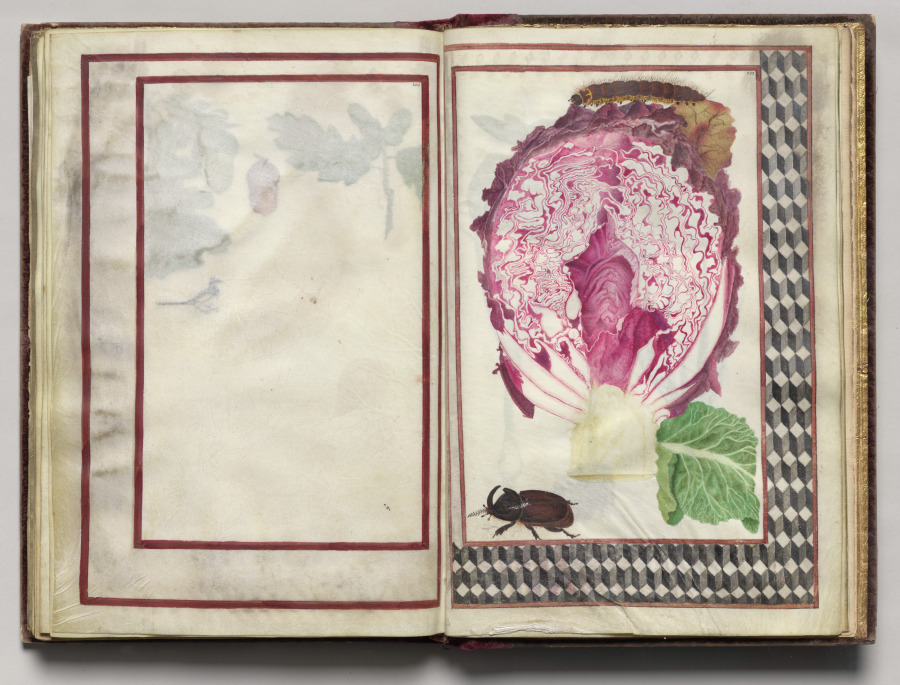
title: Border, folio 44 (verso), from Florilegium (A Book of Flower Studies)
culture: France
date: 1608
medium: watercolor, ink, silver and gold over occasional traces of pencil, on vellum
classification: Bound Volume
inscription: Dated: Poitiers 1608 (on frontispiece) Signed: On frontispiece in black ink, lower right: Van Kuyk Notation on drawing: Frontispiece: in pencil, lower margin: * élève de Van Kessel, peintre flammand (* in pencil also appears in front of Van Kuyk's name).